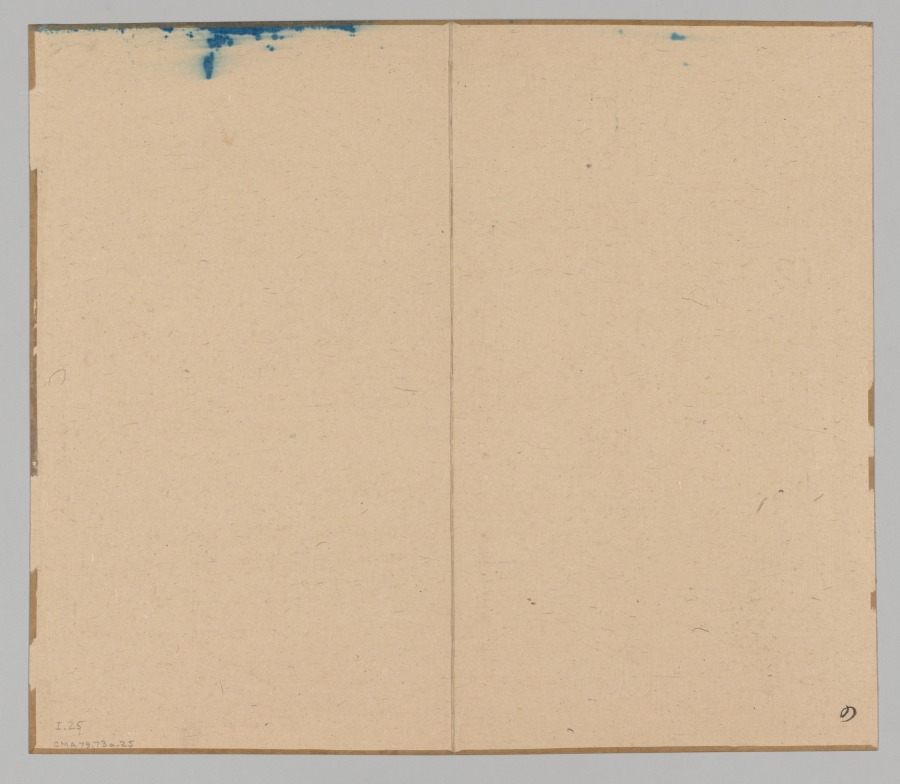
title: Reverberations of Taiga, Volume 1 (leaf 25)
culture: Japan, Edo period (1615–1868)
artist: Aoki Shukuya (Japanese, d. 1802)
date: mid- to late 1700s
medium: double-leaf from a pair of albums; ink and light color on paper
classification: Portfolio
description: Traditionally, young painters in Japan began their studies with an established master-painter. The master's compositions invariably became models that the apprentice copied to learn various ink and brush techniques. Shukuya was a pupil of the famous Kyoto artist Ikeno Taiga, whose style is reflected in these sketches of rocks, trees, and mountains.